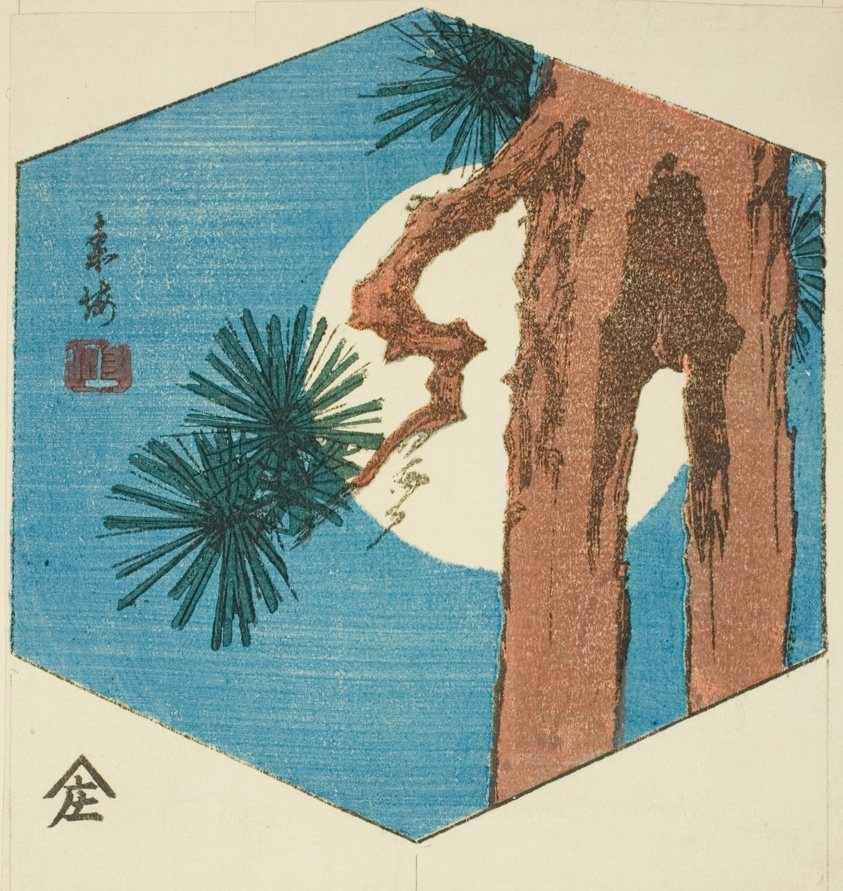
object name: Print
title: Pine tree and full moon, section of an untitled harimaze sheet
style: Japanese (culture or style)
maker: Utagawa Hiroshige 歌川 広重; Japanese, 1797-1858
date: c. 1850s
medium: Color woodblock print; section of harimaze sheet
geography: Japan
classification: woodblock print; print; asian art